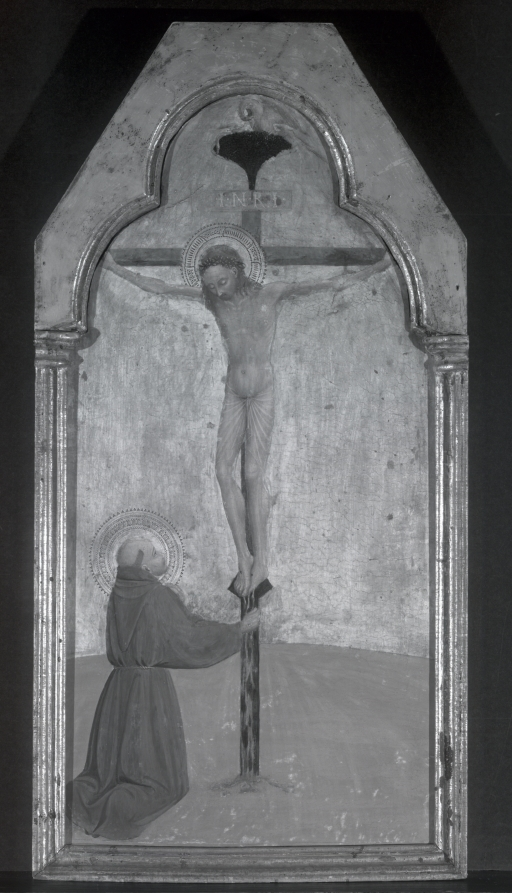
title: St. Francis Kneeling before Christ on the Cross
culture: Italy, 15th century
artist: Sassetta (Italian, 1392–1450)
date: 1437–1444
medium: tempera and gold on wood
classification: Painting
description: Because of his simplicity, piety, and devotion to all living creatures, Saint Francis (1181–1226) has remained among the most revered and popular saints. Born to wealthy parents in Assisi, he first lived a life of spendthrift luxury. However, Francis later gave up all worldly goods and embraced an existence of utter poverty. Throughout his adult life, the saint experienced mystical trances and visions of Christ. Atop the cross here is a leafy tree and a nest of pelicans. Fifteenth-century viewers would have recognized the tree as a reference to the cross, which is often described as a tree, symbolizing Christ's role as the source of eternal life. The pelican, shown nourishing its young with its own blood, symbolizes Christ, who sacrifices himself for the salvation of mankind. This painting was the center pinnacle on the back of a double-sided altarpiece made for the church of San Francesco in Borgo Sansepolcro (near Arezzo).